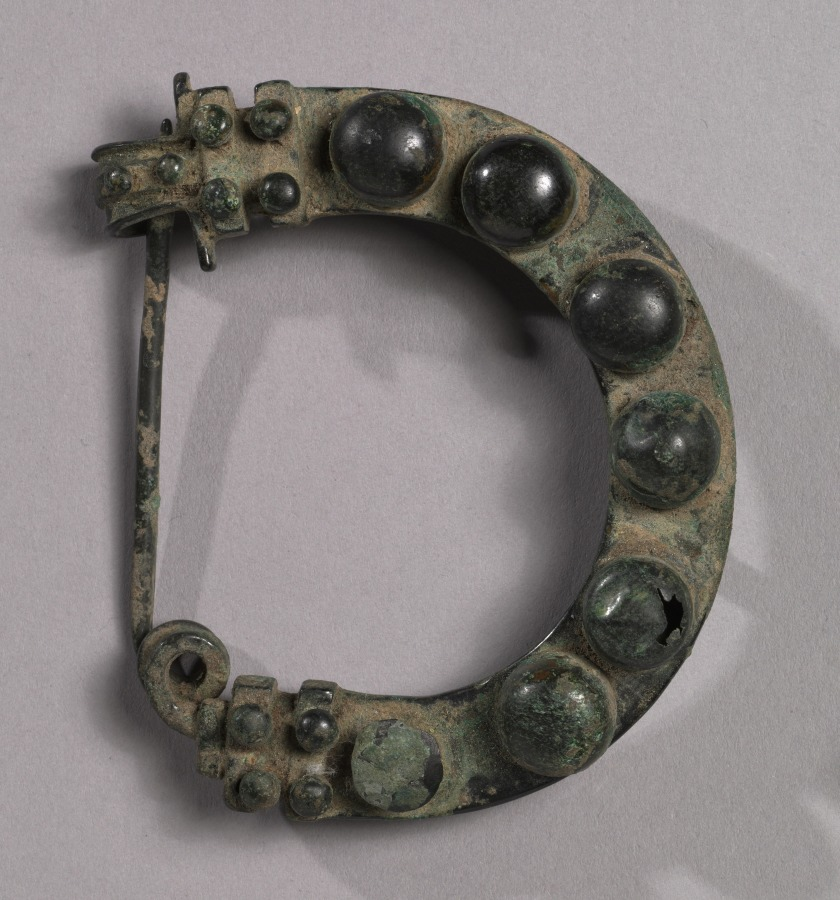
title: Arched Fibulae (2 of 2)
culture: Anatolia, Phrygia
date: 725–675 BCE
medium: bronze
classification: Metalwork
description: Dated to the time of King Midas, these fibulae may have been a matched pair. The type was popular and has been found throughout Anatolia and in Greece. In the 5th century BC the Greek historian Herodotus wrote that the Phrygian king Midas reigned in the late 8th century BC, and dedicated a throne to the oracle at Delphi. This is the earliest historical reference to the Phrygians, a name given them by the ancient Greeks. The passage in Herodotus, taken together with archaeological finds in the Ionian Greek city states and on the Greek mainland, shows that Phrygians and Greeks enjoyed close relations in the late 8th to early 7th century BC.